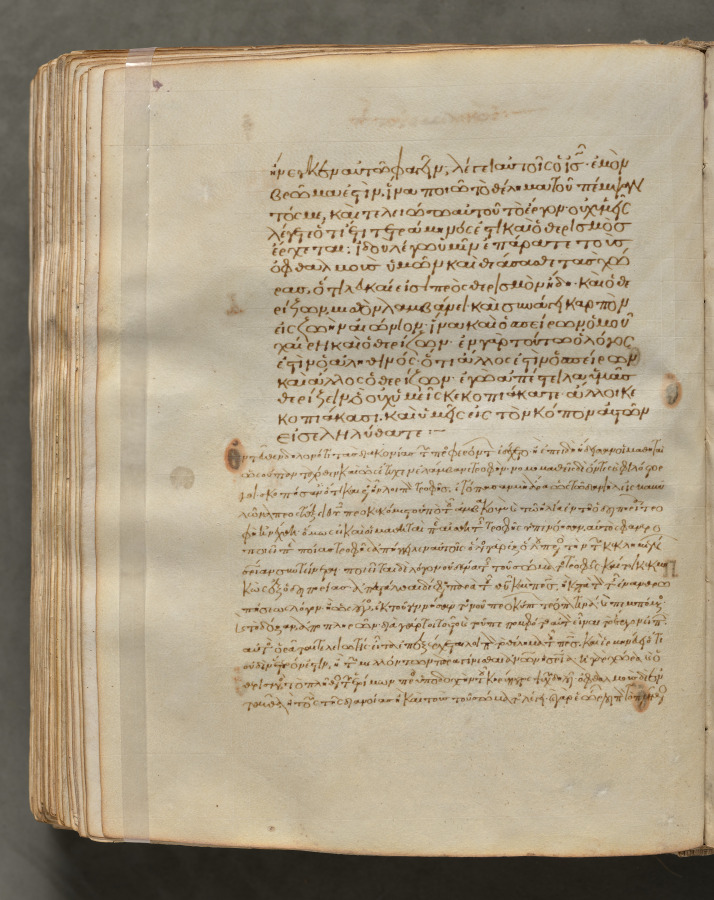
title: Text, folio 340 (verso), from a Gospel Book with Commentaries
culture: Byzantium, Constantinople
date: c. 1000–1100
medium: ink, tempera, and gold on vellum; leather binding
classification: Bound Volume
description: Each of the four gospels in this book opens on a page with brilliantly illuminated borders depicting the author of the text as well as birds—principally peacocks, symbols of the immortality of the soul—and fountains, representing the fountain of life and the salvation of the soul. This volume consists of 428 leaves with texts in Greek. Its level of sophistication suggests that it was probably written and decorated in a monastery in Constantinople.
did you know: Gospel books were carried in procession through Byzantine churches.